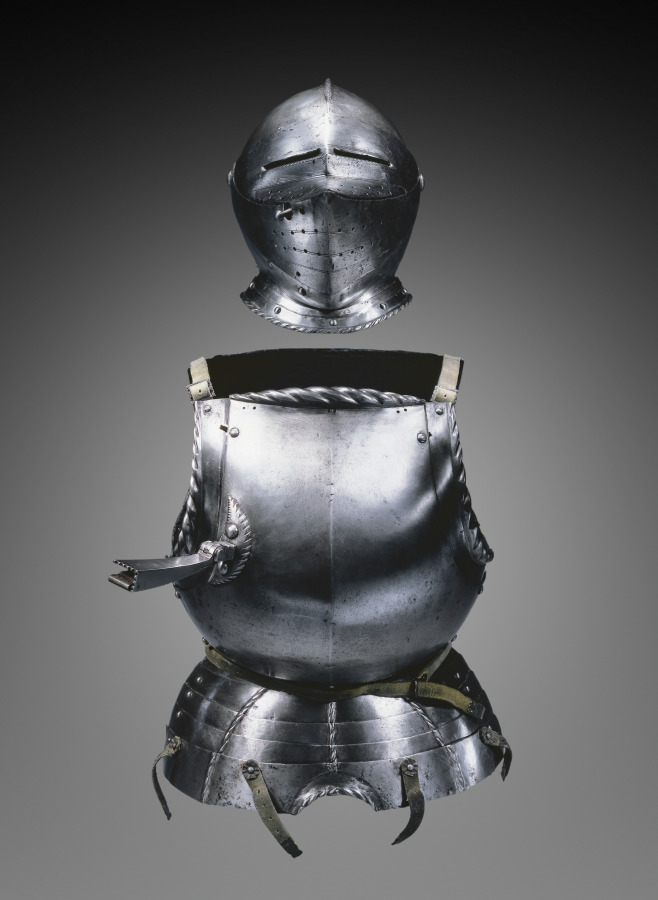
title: Elements from a Partial Suit of Armor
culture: Germany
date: c. 1510–30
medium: steel with black paint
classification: Arms and Armor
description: This partial suit of armor contains a close helmet, breastplate, and backplate. Below the breast plate is the fauld, plates of armor that extend below the breastplate to protect the waist and hips. The breastplate includes a lance rest, a metal flange that could be brought down when needed. The lance rest helps spread the impact of a blow through the breastplate to the torso of the wearer, thus redirecting the force of the blow away from the hand, wrist, elbow, and shoulder. The helmet is a true "close helmet"; it pivots open at the rivets on the side and completely protects the face when lowered.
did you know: Unfortunately the remainder of this suit of armor has been lost to history.